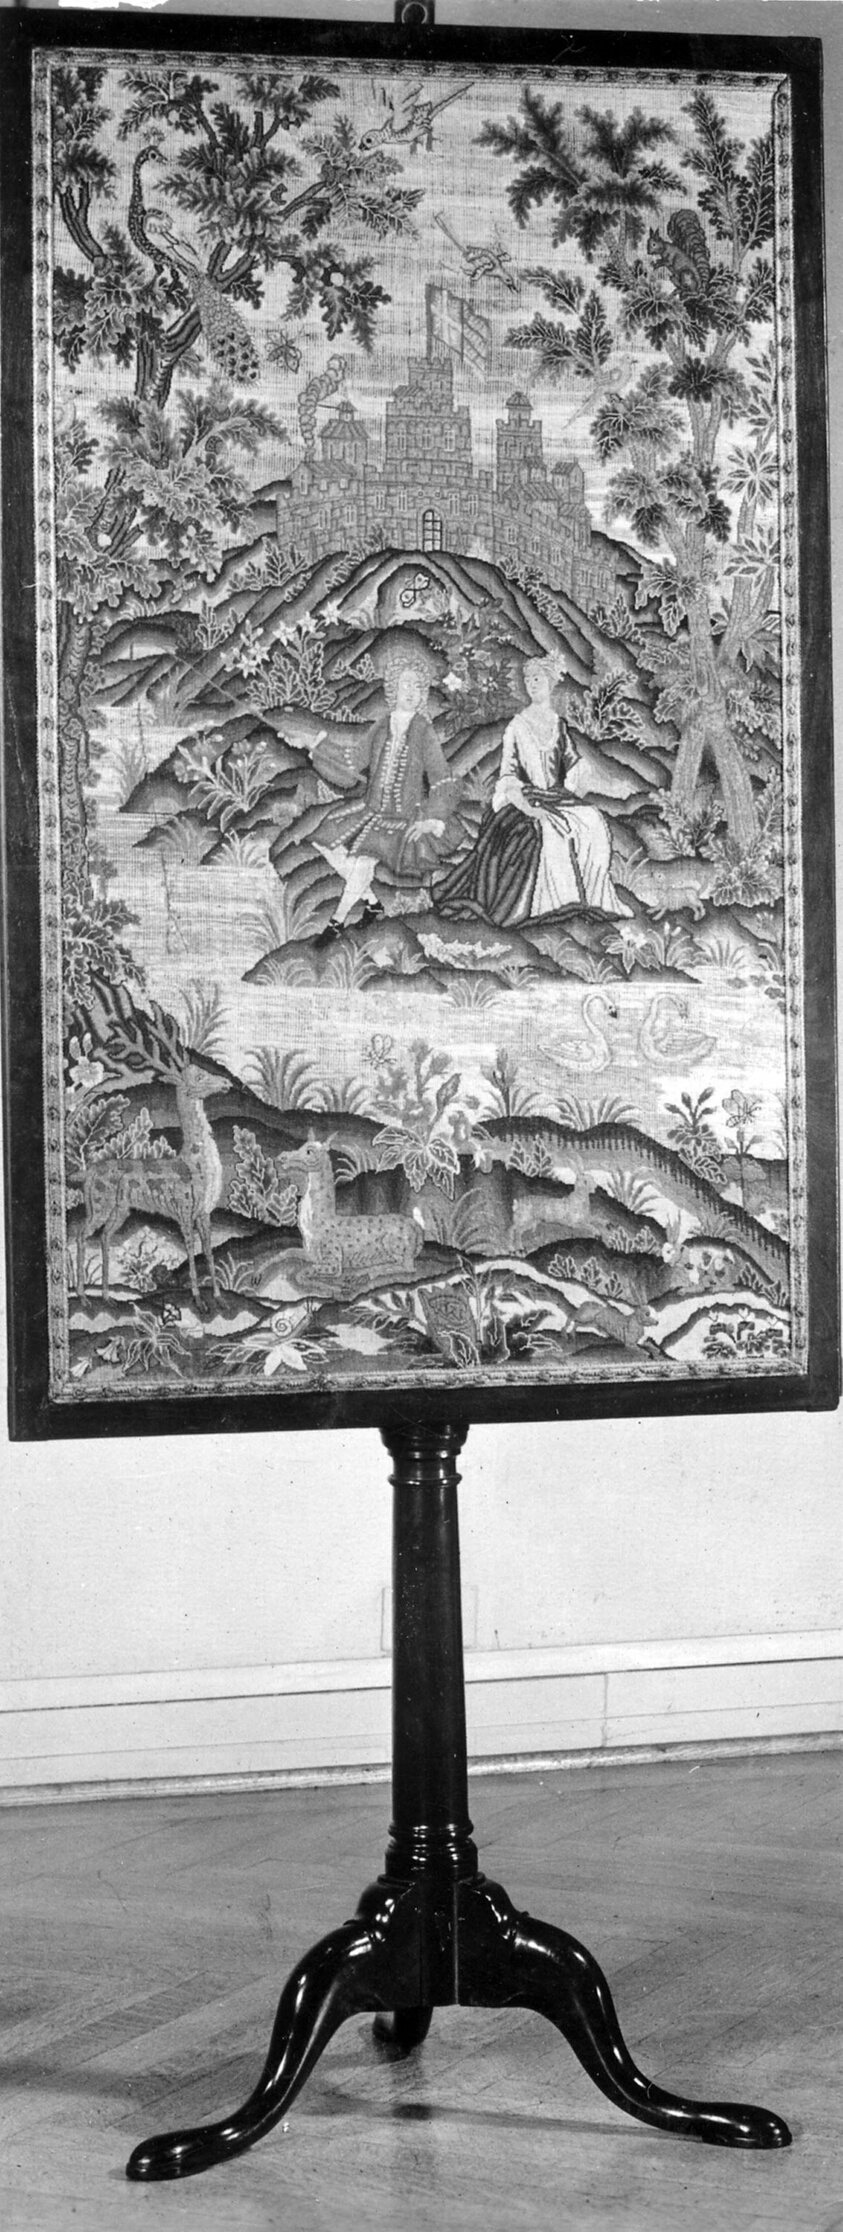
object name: Textile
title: Pole Screen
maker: England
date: 18th century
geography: England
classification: textile; screen; furniture; needlework (visual works)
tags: furniture